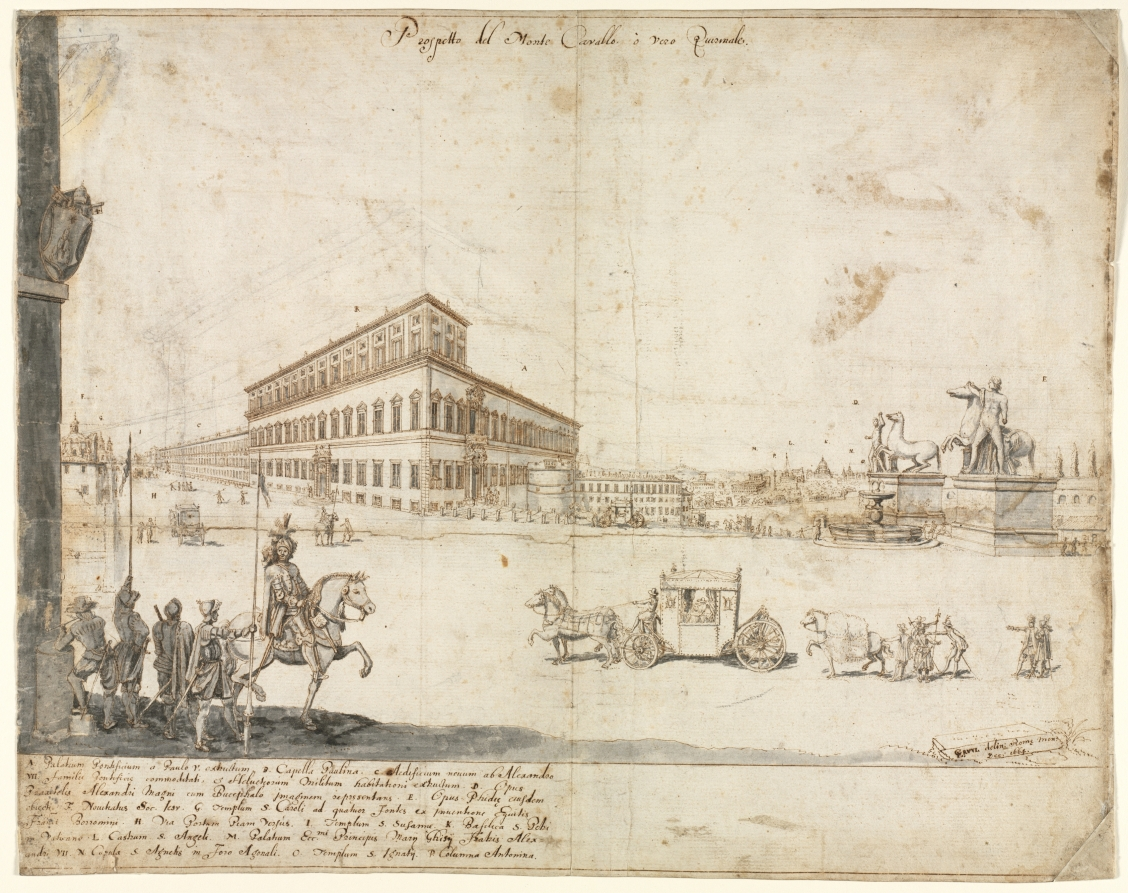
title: Eighteen Views of Rome: The Quirinale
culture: Flanders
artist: Lievin Cruyl (Flemish, c. 1640-c. 1720)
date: 1664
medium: pen and brown ink and brush and gray wash over graphite; framing lines in brown ink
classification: Drawing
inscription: signed, lower right, in brown ink: [artist monogram: LC] RVYL delin: Romæ men: / Dec: 1664 ; by artist, upper center, in brown ink: Prospetto del Monte Cavallo, ò vero Quirinale. ; by artist, throughout composition, in brown ink: [the letters A-P] ; by artist, lower left, in brown ink: A. Palatium Pontificum a Paulo V. extructum. B. Capella Paulina. C. Aedificum novum ab Alexandro / VII. familiæ Pontificiæ commoditati, et Helvetiorum Militum habitationi extructum. D. Opus / Praxitelis Alexandri Magni cum Bucephalo jmaginem repraesentans. E. Opus Phidiae eiusdem / obiecti. F. Novitiatus Soc. Iesu. G. Templum S. Caroli ad quatuor Fontes ex jnventione Equites / Franci Borromini. H. Via Portum Piam Versus. I. Templum S. Susannæ. K. Basilica S, Petri / in Vaticano. L. Castrum S. Angeli. M. Palatium Ecc.mi [mi superscript] Principis Marij Ghisij Fratris Alex= / andri VII. N. Cupola S. Agnetis in Foro Agonali. O. Templum S, Ignatij. P. Columna Antonina. ; VERSO, upper left, in ink?: [illegible, masked] ; ON STRIPS OF PAPER MOUNTED TO VERSO, lower right, in graphite: A 20972 [sideways] ; lower right, in graphite: [E. ?] #6